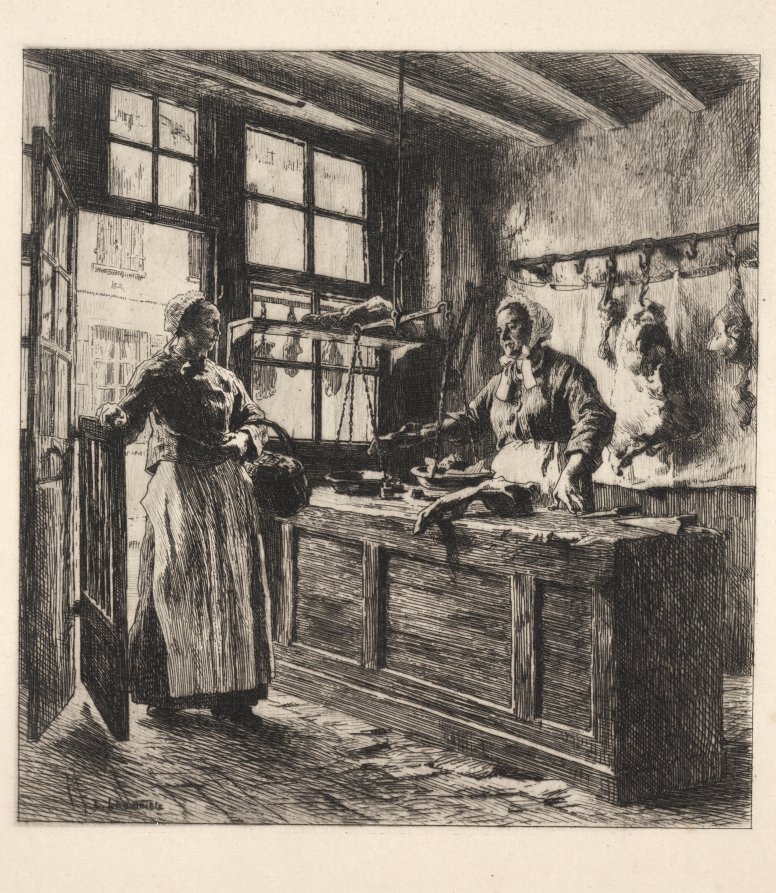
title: Interior of a Butcher Shop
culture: France, 19th century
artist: Léon Augustin Lhermitte (French, 1844–1925)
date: c. 1881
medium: etching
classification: Print